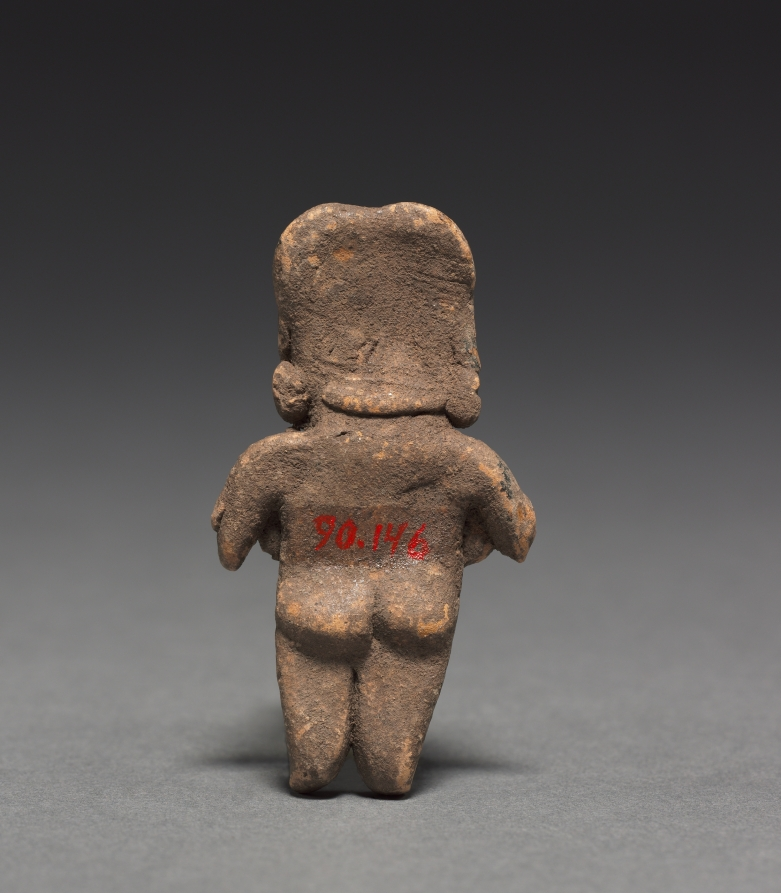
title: Female Figurine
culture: Mexico, Chupíuaro, Guanajuato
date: 400–100 BCE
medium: pottery with traces of white pigment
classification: Sculpture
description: The Chupícuaro culture, located north of Mexico City in the state of Guanajuato, created a distinctive ceramic tradition including small clay figurines. This example is said to belong to a group of ten figurines from the same burial or cache (1990.145–154). The group includes both males and females that can be sorted into couples based on size.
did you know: Groups of figurines were sometimes arranged in scenes and likely used in household rituals.